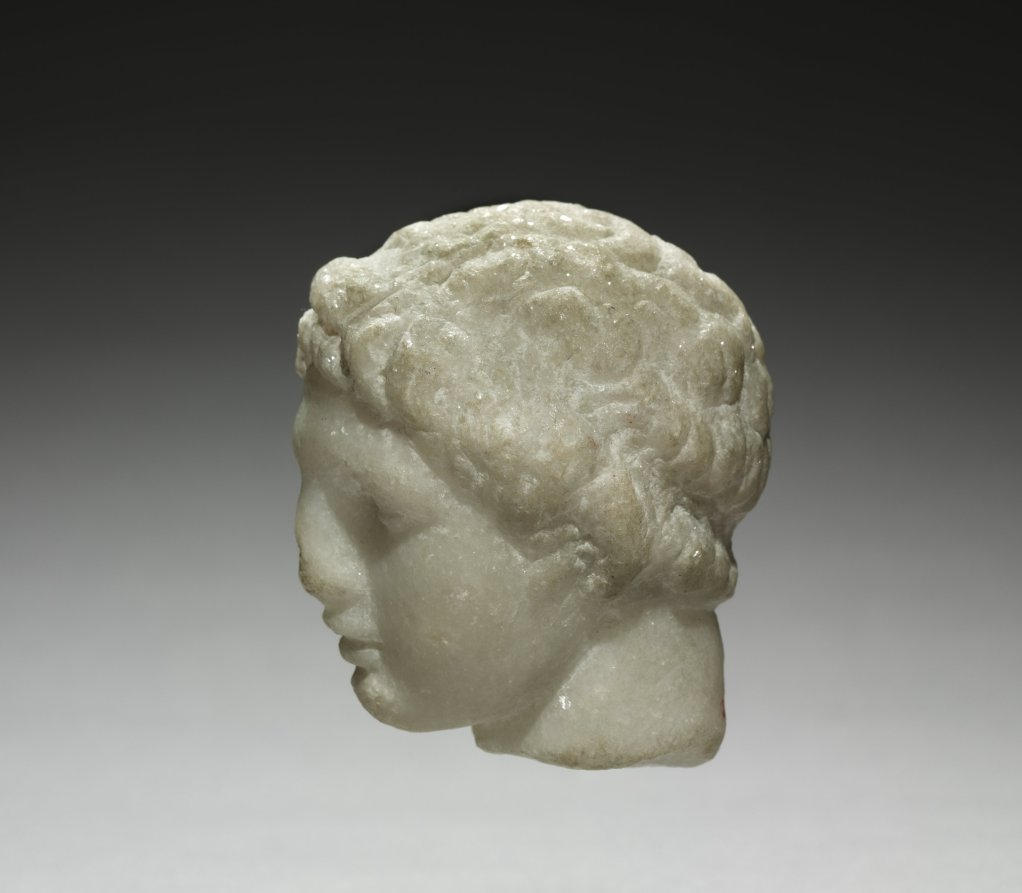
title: Head of a Man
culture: Greece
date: 200s BCE?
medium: marble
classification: Sculpture